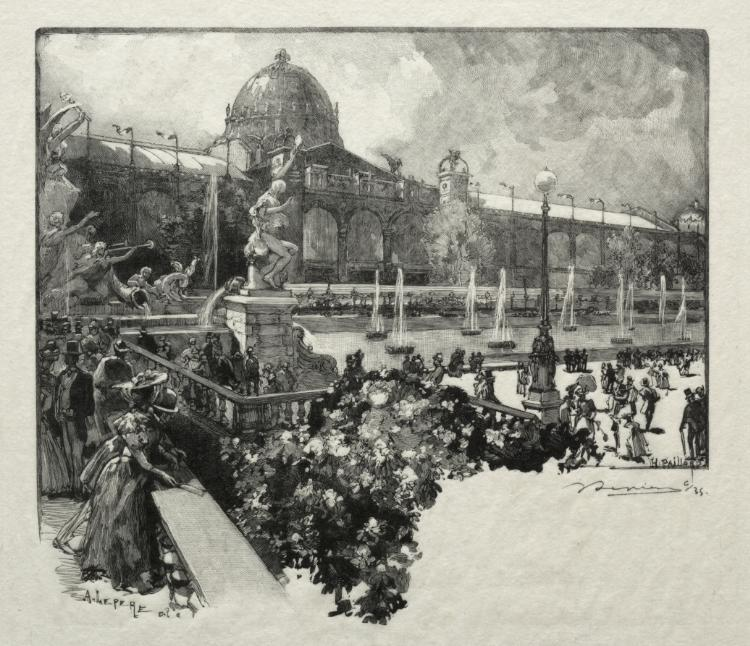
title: Le Palais des Arts Liberaux, Extérieur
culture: France, 19th-20th century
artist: Auguste Louis Lepère (French, 1849–1918)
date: 1889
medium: wood engraving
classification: Print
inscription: On block, lower left corner: "A. Lepère del"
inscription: On block, lower right: "H. Paillard"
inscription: Written in ink: "(signed) 6/35"